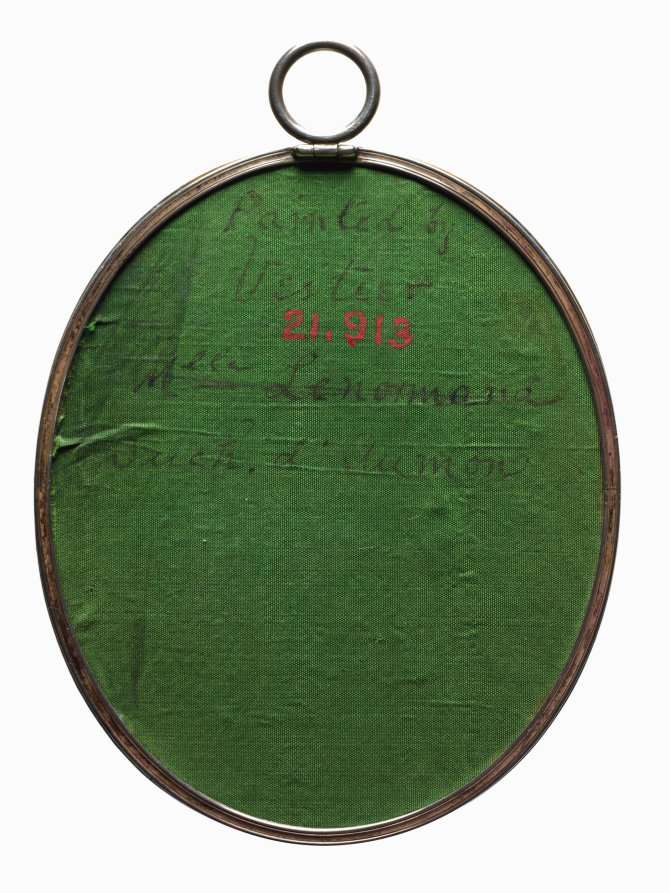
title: Portrait of a Woman with a Guitar, called Louise D'Aumont, Mazarin, Duchesse d'Aumont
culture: France, 18th century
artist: Antoine Vestier (French, 1740–1824)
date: late 18th century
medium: watercolor on ivory in gold mount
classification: Portrait Miniature